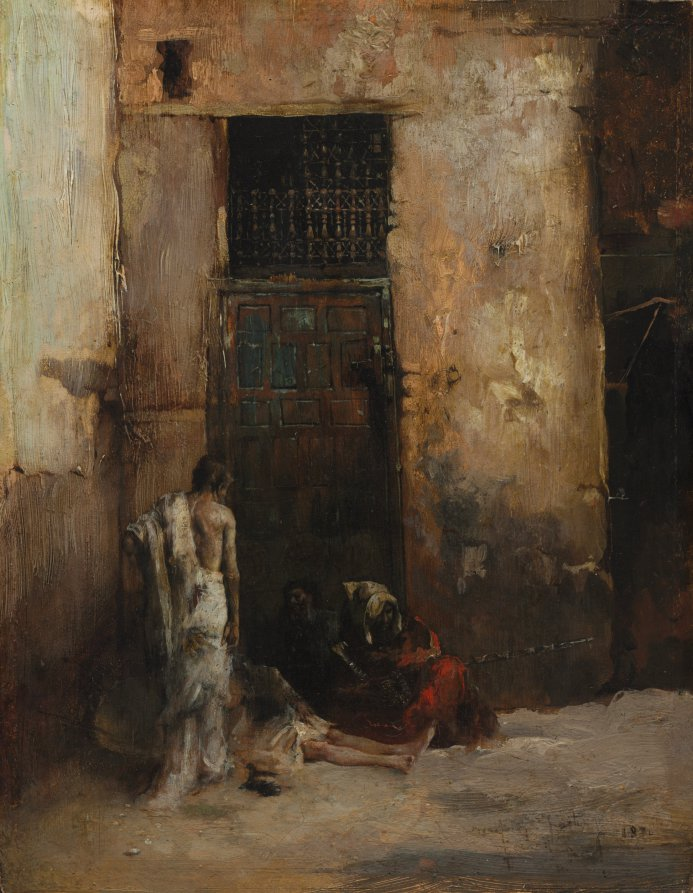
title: Beggars by a Door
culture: Spain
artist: Mariano Fortuny (Spanish, 1838–1874)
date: 1870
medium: oil on panel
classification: Painting